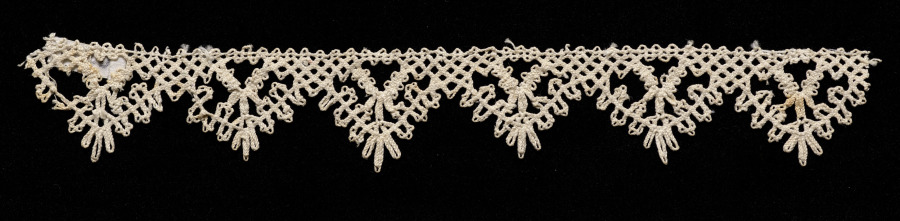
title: Lace Edging of Points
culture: Italy, Venice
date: 1540–60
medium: Bobbin lace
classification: Lace